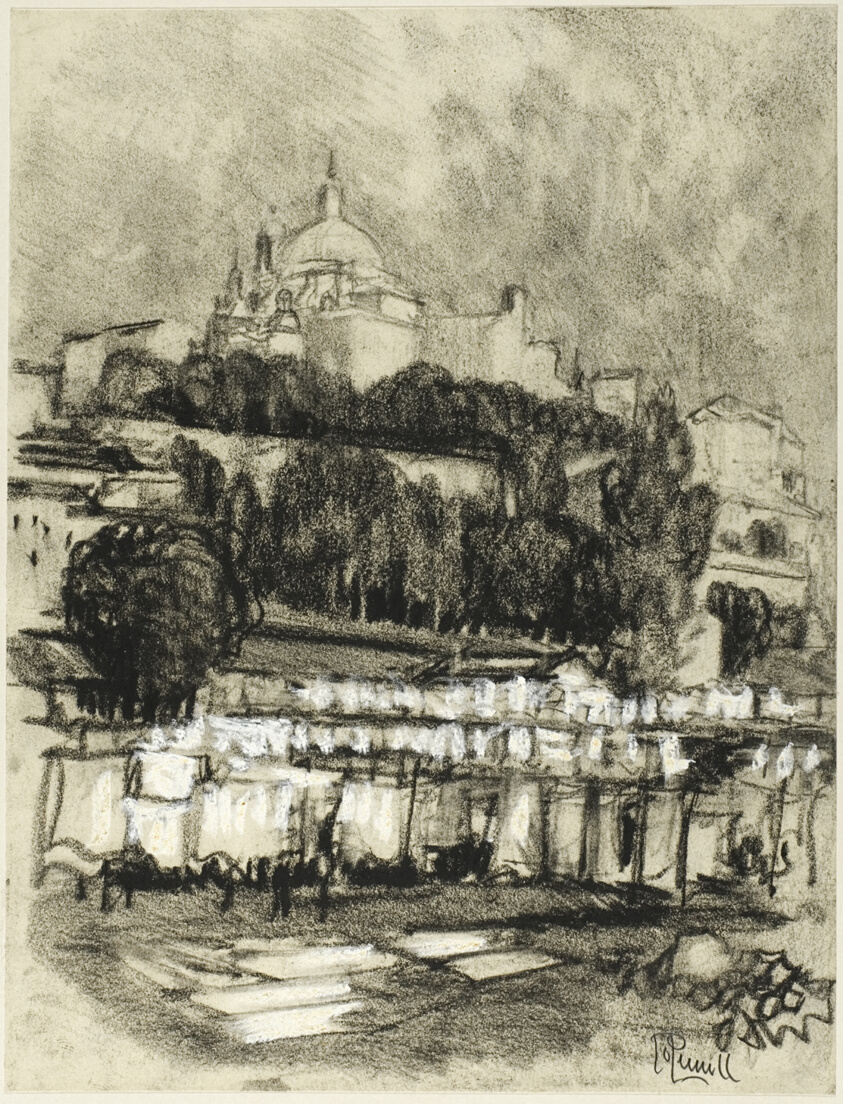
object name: Drawing and Watercolor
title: The Washing Place of Madrid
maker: Joseph Pennell (American, 1857-1926)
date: c. 1903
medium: Oiled charcoal with stumping and erasing, heightened with white chalk, on cream wove paper, perimeter mounted on off-white wood pulp laminate board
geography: United States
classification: charcoal; drawings (visual works); prints and drawing